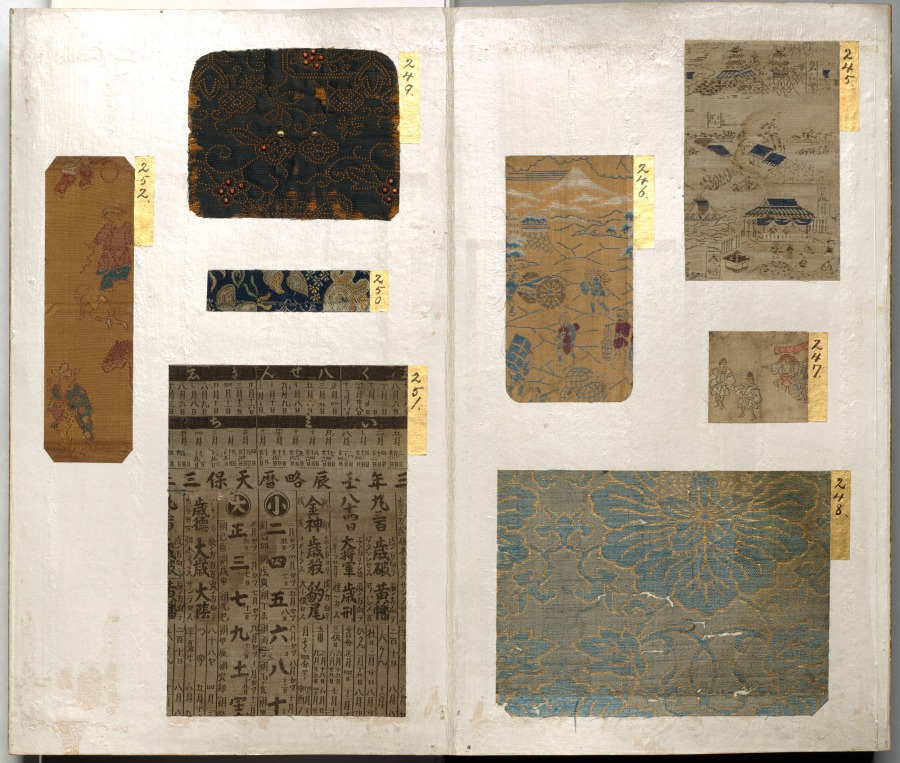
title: Album of Textile Samples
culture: Japan, Edo period (1615–1868)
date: 1600s-1700s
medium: silk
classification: Textile